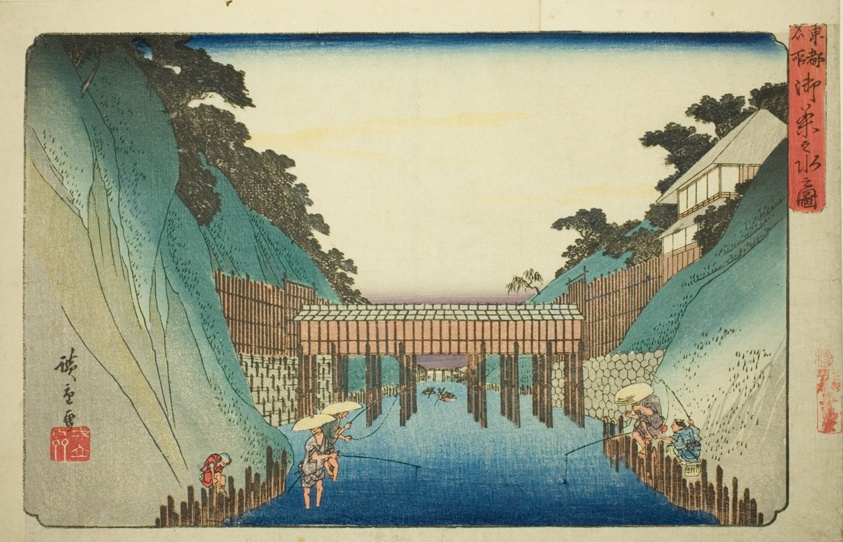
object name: Print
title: View of Ochanomizu (Ochanomizu no zu), from the series "Famous Places in the Eastern Capital (Toto meisho)"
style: Japanese (culture or style)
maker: Utagawa Hiroshige 歌川 広重; Japanese, 1797-1858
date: c. 1832/39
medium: Color woodblock print; oban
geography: Japan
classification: woodblock print; print; asian art